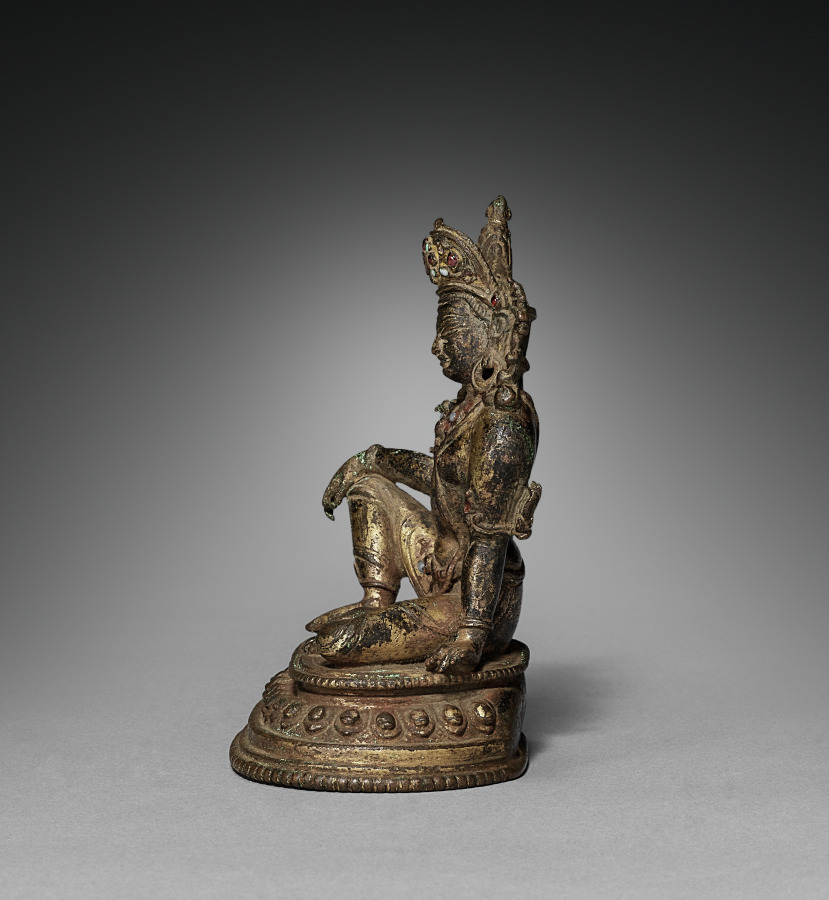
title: Avalokiteshvara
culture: Nepal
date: 1300s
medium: gilt bronze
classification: Sculpture